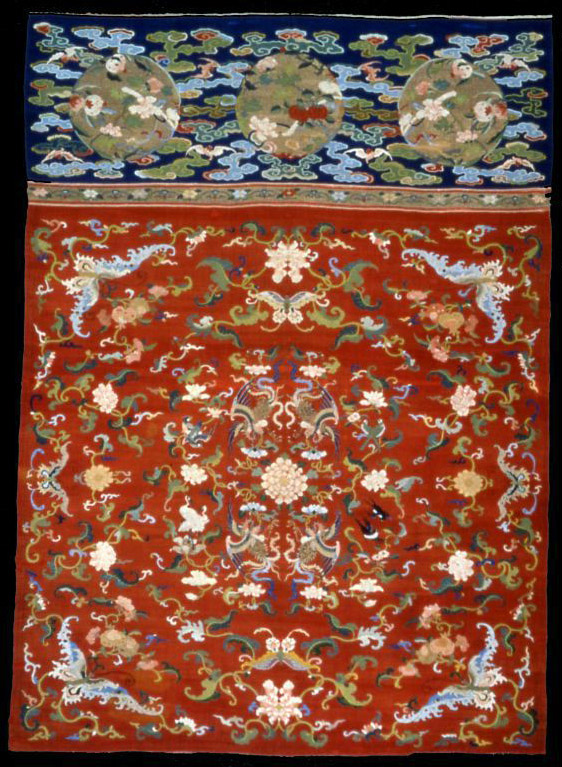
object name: Textile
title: Panel (Furnishing Fabric)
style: ming, qing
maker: China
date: Ming dynasty (1368–1644)/Qing dynasty (1644–1911), 1600/50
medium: Silk and gold-leaf-over-lacquered-paper-strip-wrapped silk, slit tapestry weave with interlaced outlining wefts; painted details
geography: China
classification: textile; weaving; furnishing textile